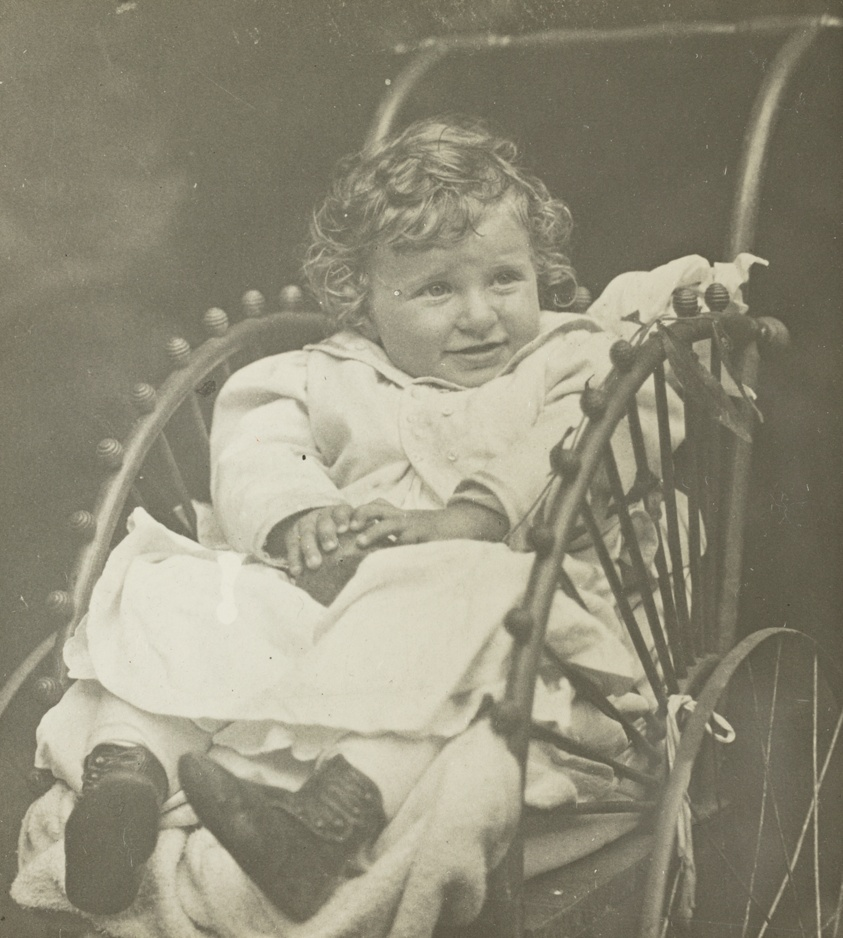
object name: Photograph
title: Untitled (Howard Schubart in Carriage)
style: 19th century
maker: Alfred Stieglitz (American, 1864–1946)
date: 1893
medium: Lantern slide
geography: United States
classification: lantern slide (glass); negative/transparency; photography; photograph